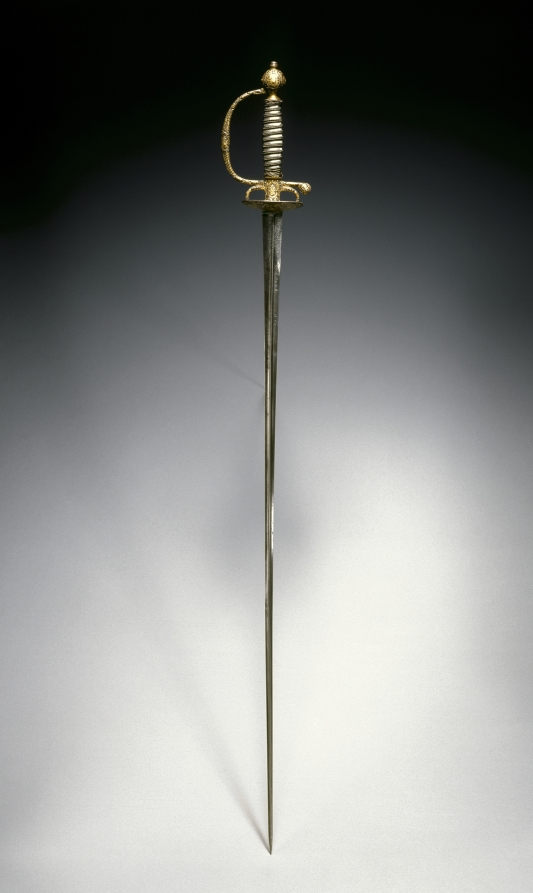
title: Smallsword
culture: France, Paris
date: c. 1730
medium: steel, blued, with gold encrusted decoration; chased and engraved; silver wire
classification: Arms and Armor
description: During the 1700s, the small-sword emerged as a light, quick weapon. Like the rapier it was carried by unarmored civilians, the noblemen of the upper classes. Over time this delicate sword became more an accessory of male attire than a weapon essential to life and death. The sword hilt, which shows even when the blade is sheathed, became the ground for elaborate decoration. These small swords thus represent the final stage in the evolution of the sword, from the edged weapons of antiquity to the elegantly refined blades of the 1700s and 1800s.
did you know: The decorative design of the hilt was often carried down onto the blade, which could be chased or etched with designs, and gilded or blued as seen here.